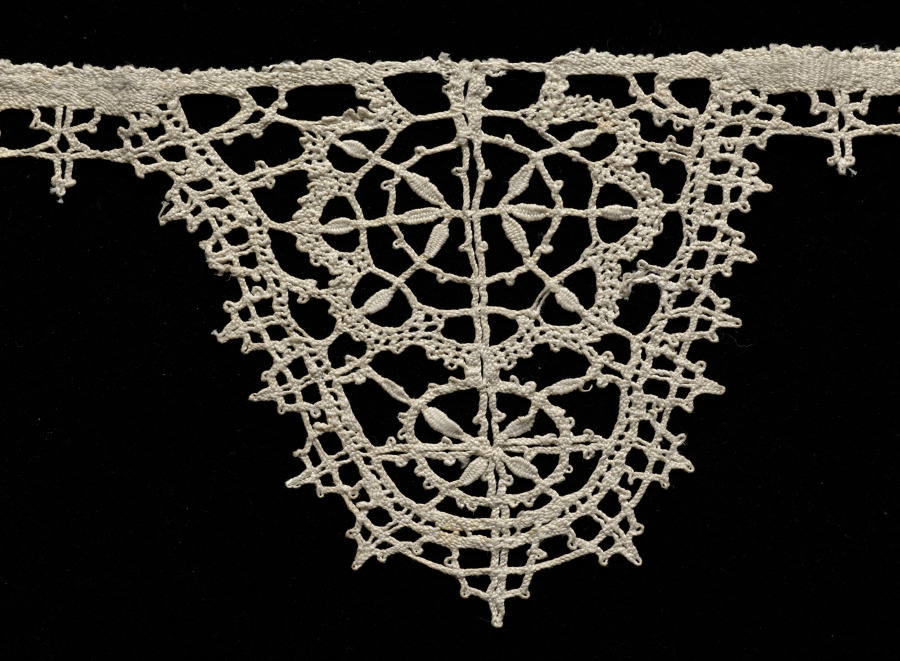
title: Lace Edging of Points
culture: Italy, Genoa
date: 1600s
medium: Bobbin lace (rose lace)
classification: Lace